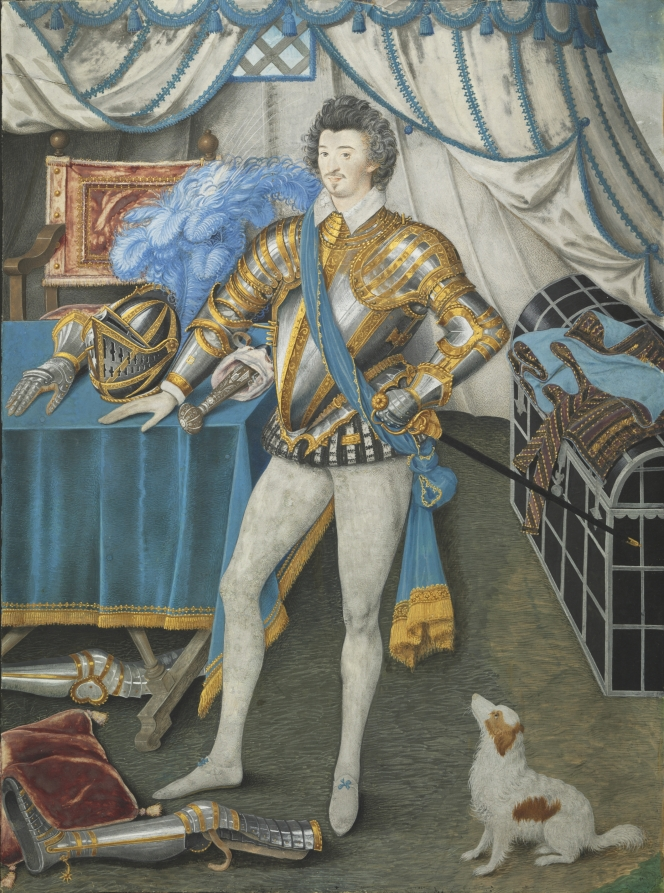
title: Sir Anthony Mildmay, Knight of Apethorpe, Northamptonshire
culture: England, 16th century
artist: Nicholas Hilliard (English, c. 1547–1619)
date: c. 1590–93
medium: Watercolor on vellum, laid on card, mounted on wood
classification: Portrait Miniature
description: Framed by the folds of a circular tent, Sir Anthony Mildmay strikes a relaxed and confident pose, with his right hand resting on a cloth-covered table and his left grasping the hilt of his thin, double-edged sword called a rapier. Helmet, gauntlet, and leg coverings are scattered about, as if Mildmay has been interrupted in the act of putting on or taking off his armor. Despite its small scale, this portrait reveals Nicholas Hilliard’s emulation of (and rivalry with) life-size court portraiture, while his meticulous attention to detail and use of costly materials like shell gold reflect the refined world of courtly tournaments.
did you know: A little dog gazes adoringly at Mildmay who was by all accounts a very arrogant man.